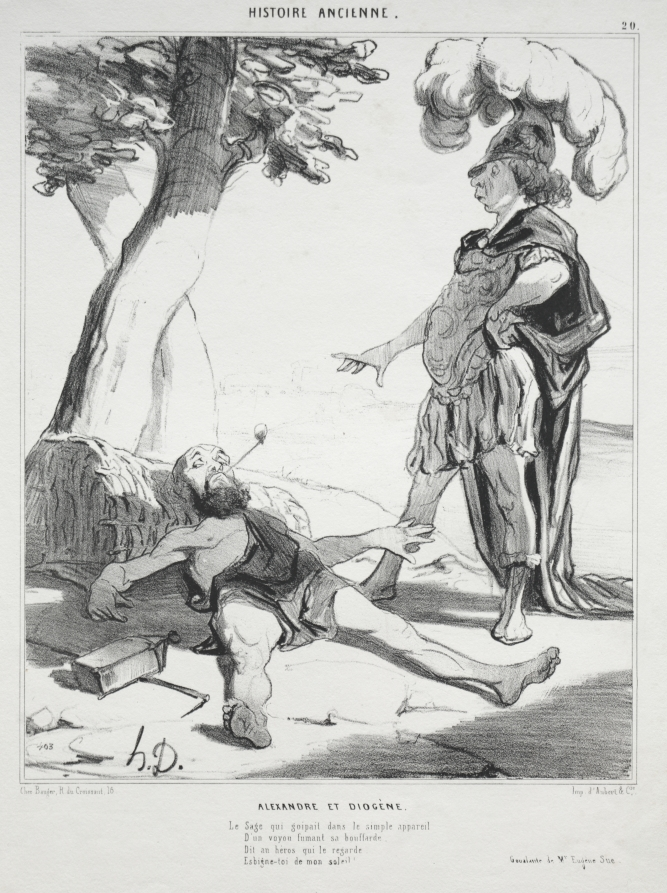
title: Alexander and Diogenes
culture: France, 19th century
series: Ancient History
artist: Honoré Daumier (French, 1808–1879)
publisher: Aubert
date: 1842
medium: lithograph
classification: Print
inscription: lower margin, printed: Chez Bauger, R. du Croissant, 16 / Imp. d'Aubert & Cie.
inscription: Above image, printed: HISTORIE ANCIENNE. / 20 ; below image, printed: "ALEXANDRE ET DIOGÈNE. / Le Sage qui goipait dans le simple appareil / D'un voyou fumant sa bouffarde. / Dit au héros qui le regarde: / Esbigne-toi de mon soleil! / Goulante de Mr. Eugène Sue.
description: This print was published in Le Charivari (August 14, 1842) as plate 20 from the series Ancient History.